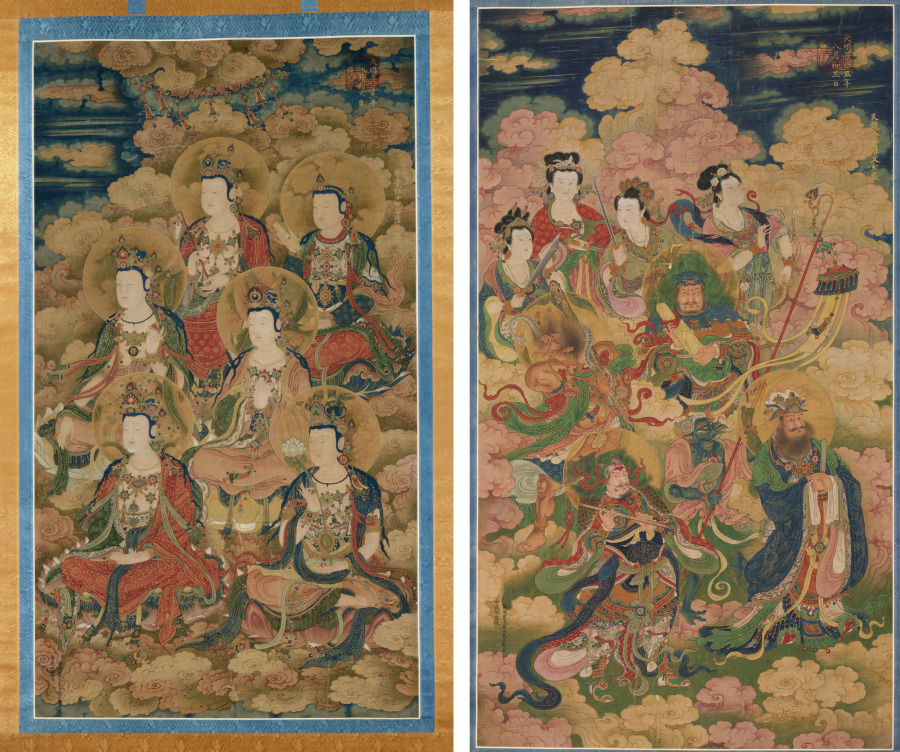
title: The Bodhisattvas of the Ten Stages in Attaining the Most Perfect Knowledge; The Eight Hosts of Deva, Naga, and Yakshi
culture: China, Ming dynasty (1368–1644)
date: 1454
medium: Pair of hanging scrolls; ink and color on silk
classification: Painting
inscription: 大明景泰五年八月初三日施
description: The grandest of the Buddhist mortuary rites is the Water-Land (shuilu) ritual. This esoteric ceremony is conducted for the salvation of “all souls of the dead on land and sea.” The ostentatious ritual was performed for imperial ancestors and high officials from the Song (960–1279) to the Ming dynasties and drew large crowds. On the second day of the weeklong ceremony, paintings are hung in the inner altar. These two scrolls belong to a set of 36 Water-Land ritual paintings that are the finest works of their types known from the Ming period. With their bright, opaque color and fine-line gilt decoration intact and unfaded, both paintings share a remarkable state of preservation. In the upper right corner of each painting is an imperial seal and an inscription in gold reading: Donated on the third day of the eighth month in the fifth year of the Jingtai reign (1454) of the Great Ming. Written in ink in the lower left corner is the record that they were made on imperial order, probably to present them to the Da Longfu monastery in Beijing. One scroll represents the Eight Hosts of Celestial Nagas and Yakshis as described in the Lotus Sutra. The other represents Bodhisattvas of the Ten Stages of Enlightenment undergoing the final processes toward Buddhahood. The sinuous curves of scarf and drapery, the layering of garments, and the minute detail all reflect the opulent visual atmosphere that surrounded the Ming worshipper in temples and spirit halls throughout the country.